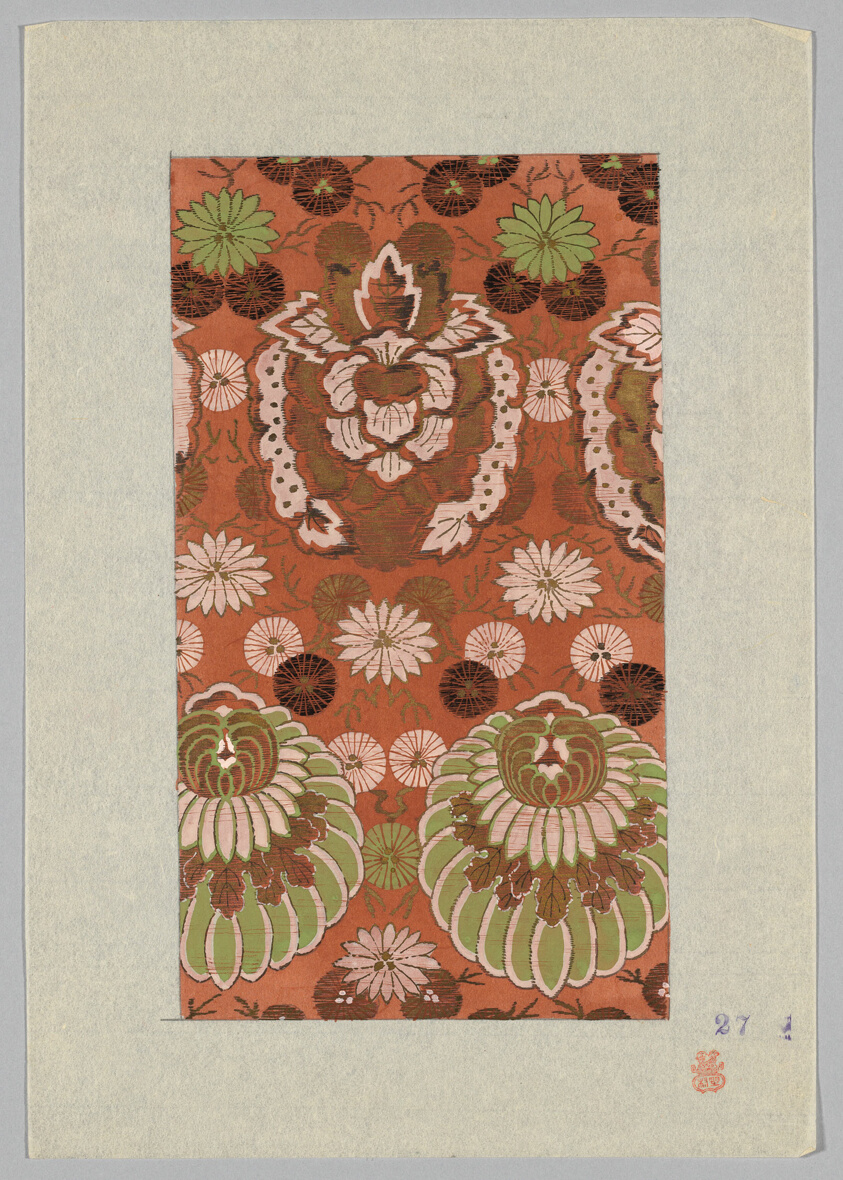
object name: Drawing and Watercolor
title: Design on Paper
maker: Japan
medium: Paper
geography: Japan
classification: textile; accessory - paper design; watercolor; paper